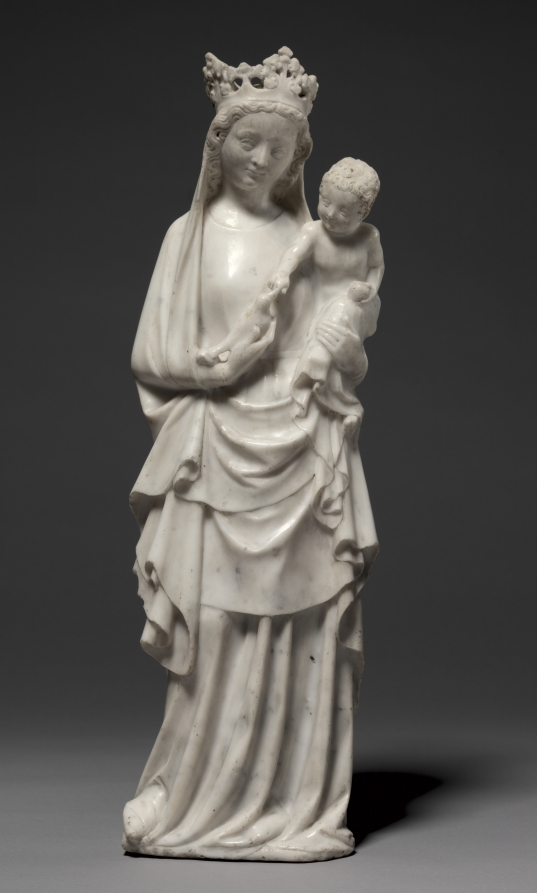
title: Virgin and Child with a Bird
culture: France, Île-de-France, Paris, 14th century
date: c. 1350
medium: marble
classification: Sculpture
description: The Virgin and Child represents one of the most frequent subjects for free-standing sculpture in 14th-century France, motivated by the developing cult of the Virgin and increasing veneration of Mary. Such sculptures were not restricted to churches, but were also found in roadside shrines, entrances to towns, and domestic use in private chapels. The small scale of this statuette suggests it was made for private veneration. The bird, held in the Virgin’s right hand, was a well-known symbol of the human soul and represents Christ’s role as redeemer of humankind.